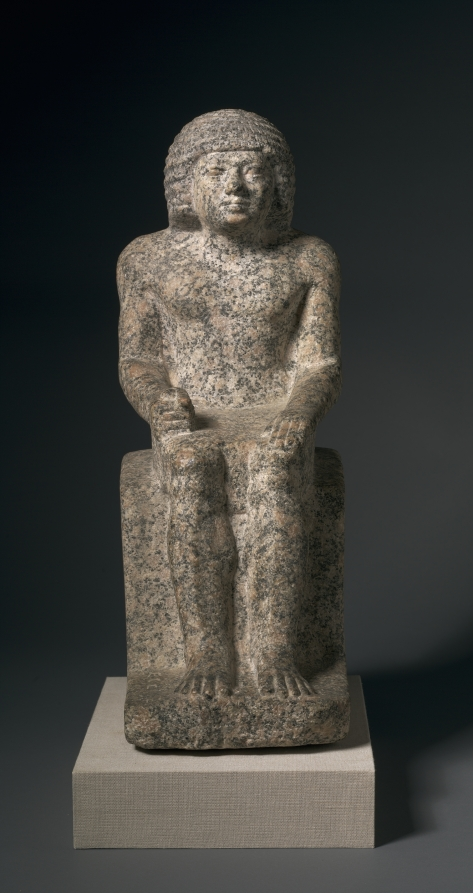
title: Seated Statue of Nykara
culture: Egypt, Old Kingdom (2647–2124 BCE), Dynasty 5, reign of Nyuserre (2445–2422 BCE) or later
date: 2408–2377 BCE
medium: red granite and pigment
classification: Sculpture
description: This statue inscribed on the base for the chief of the granary, Nykara, comes from the same tomb as the false door. A statue of granite was an expensive commodity. Monumental red granite was quarried at Aswan in the south of Egypt and had to be shipped more than five hundred miles downstream to Nykara's tomb in the area of Memphis.